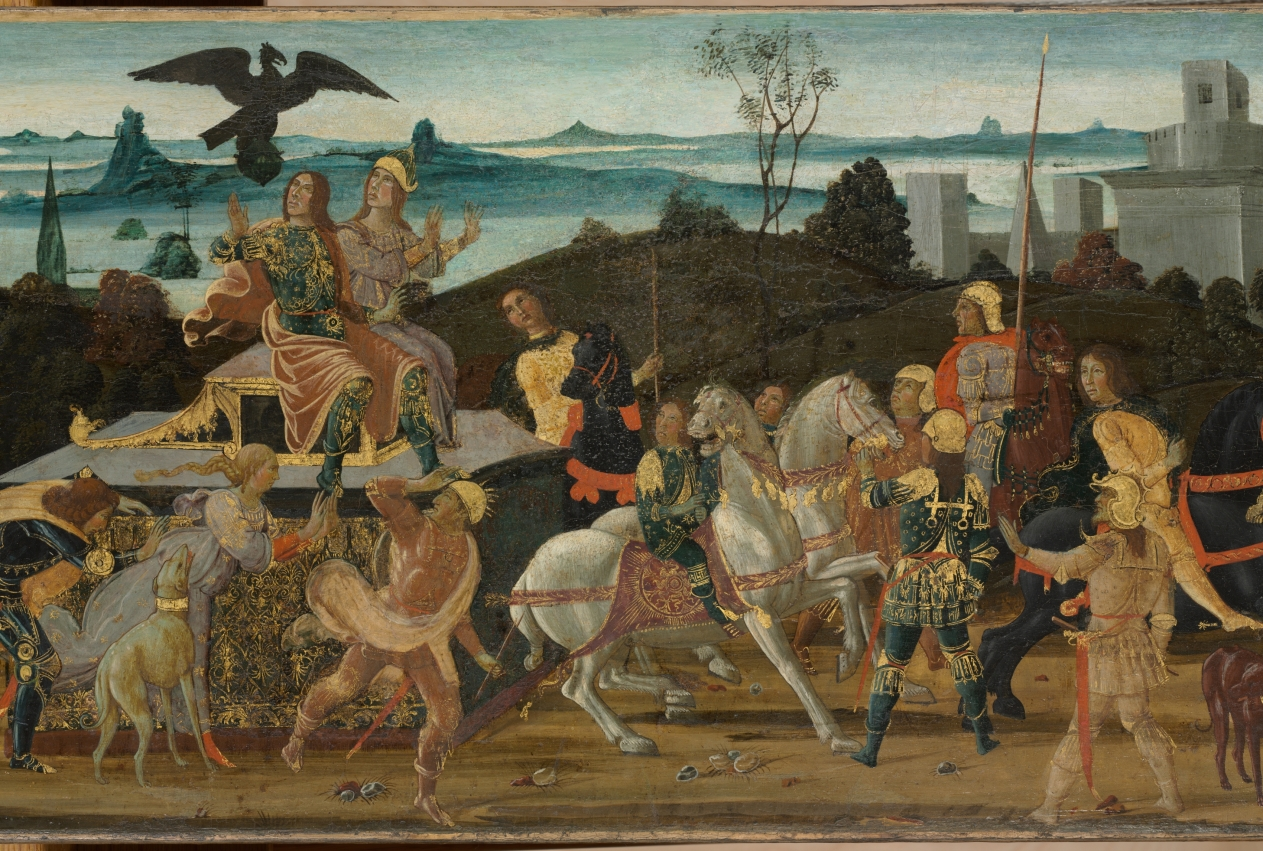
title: Tarquinius Priscus Entering Rome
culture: Italy, late 15th Century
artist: Jacopo del Sellaio (Italian, c. 1441–1493)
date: c. 1470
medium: tempera on wood, mounted on canvas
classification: Painting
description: Originally the front of a bridal chest, this panel was later removed and framed like a painting. At left, the Etruscan prophetess Tanaquil foresees her husband’s entry into Rome. En route, an eagle snatched his hat, then returned it as they approached the city, which Tanaquil interpreted as a good omen. Ancient triumphal processions, closely connected to ancient sarcophagi, were common subjects for bridal chests. Here Tanaquil is a model for a supportive, dutiful wife.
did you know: This painting utilizes continuous narrative; the same figures appear multiple times as the story unfolds from left to right.